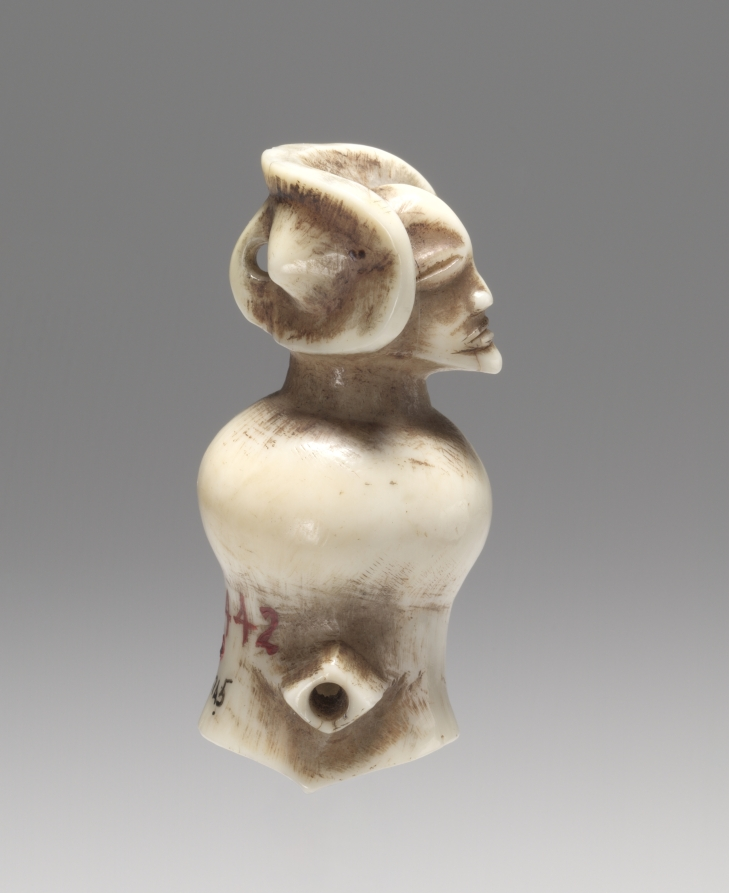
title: Whistle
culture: Africa, Central Africa, Democratic Republic of the Congo or Angola, Chokwe-style maker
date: late 1800s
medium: Probably hippopotamus ivory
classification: Musical Instrument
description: Carved out of ivory or wood in a variety of shapes, Chokwe whistles often bear miniature, stylized renderings of masks. Cikunza, the "patron saint" of the boys' initiation into manhood, is depicted with a pointed extension imitating the horn of a road antelope, symbolizing the fertility spirit. Typically such whistles were used by men during the hunt to communicate with their co-hunters and to call their dogs. They were either worn attached to a string as a necklace or tied to a spear.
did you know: This whistle is the first piece from sub-Saharan Africa acquired by the CMA.